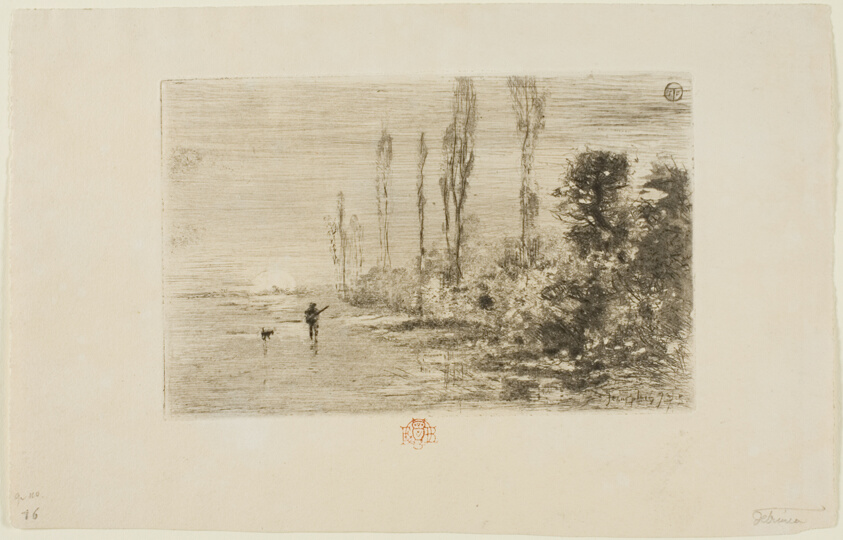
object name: Print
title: Autumn Morning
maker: Félix Hilaire Buhot (French, 1847-1898)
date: 1875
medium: Etching, aquatint and drypoint on cream wove paper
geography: France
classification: etching; print; prints and drawing